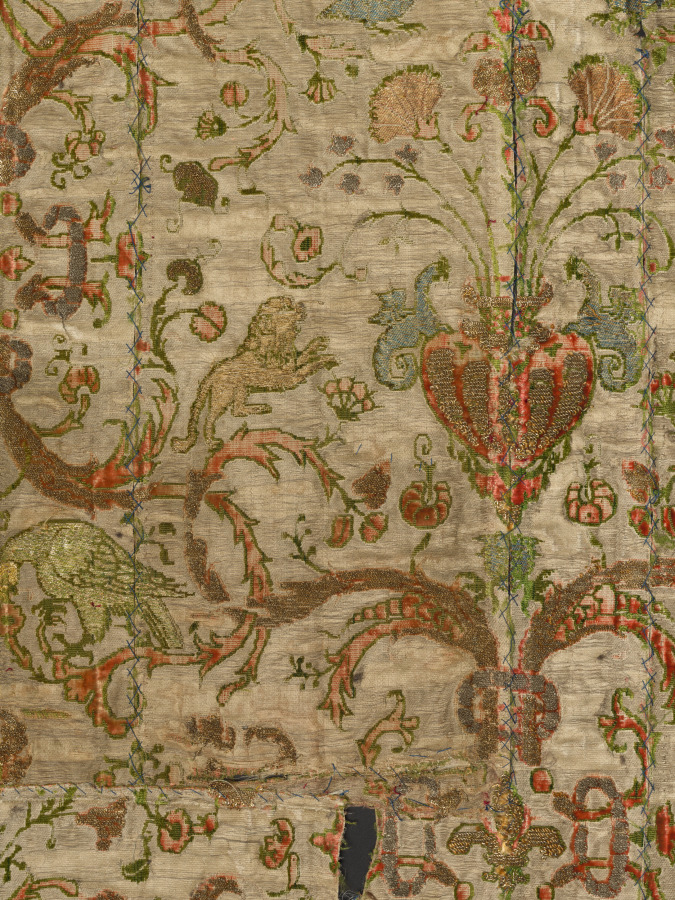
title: Fragment of Brocaded Velvet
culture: Spain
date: 1500s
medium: velvet (cut, uncut, voided, brocaded); silk and metal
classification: Velvet